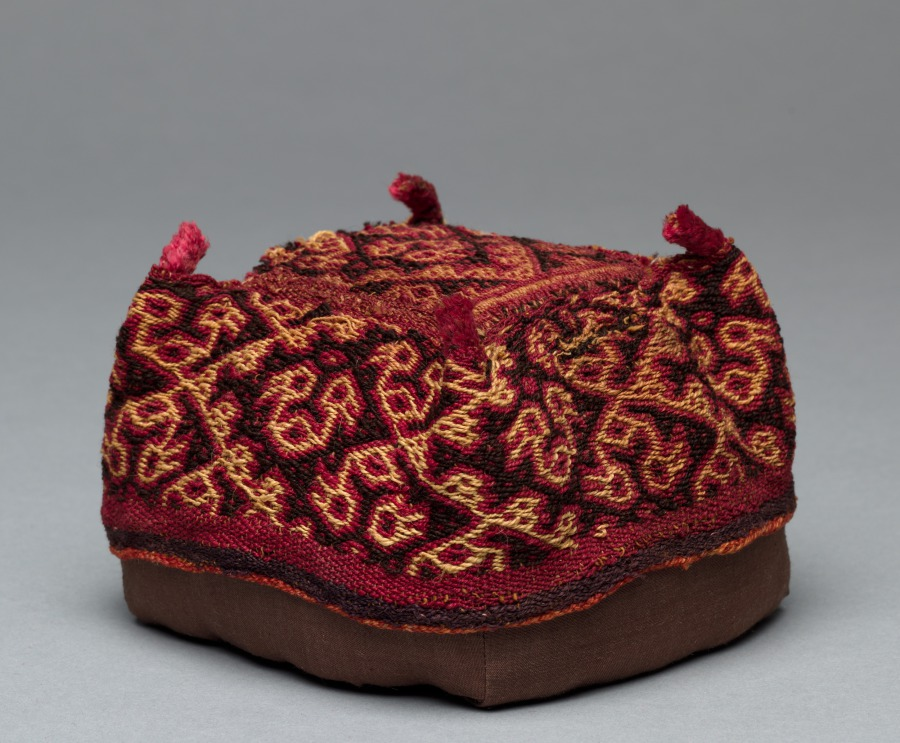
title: Four-Cornered Hat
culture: Peru, South Coast, Ica Valley, Inca Culture, 15th-16th century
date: c. 1400–1532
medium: camelid fiber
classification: Textile